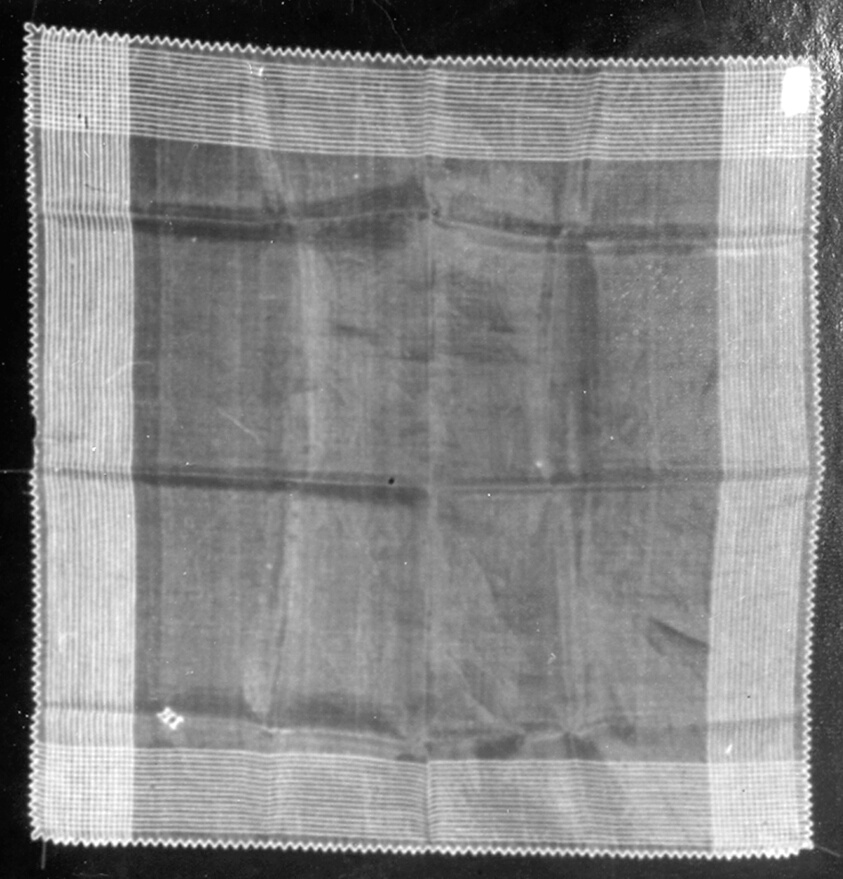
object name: Textile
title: Handkerchief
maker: France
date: 1850/1900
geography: France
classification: textile; needlework (visual works); accessories (object genre); weaving